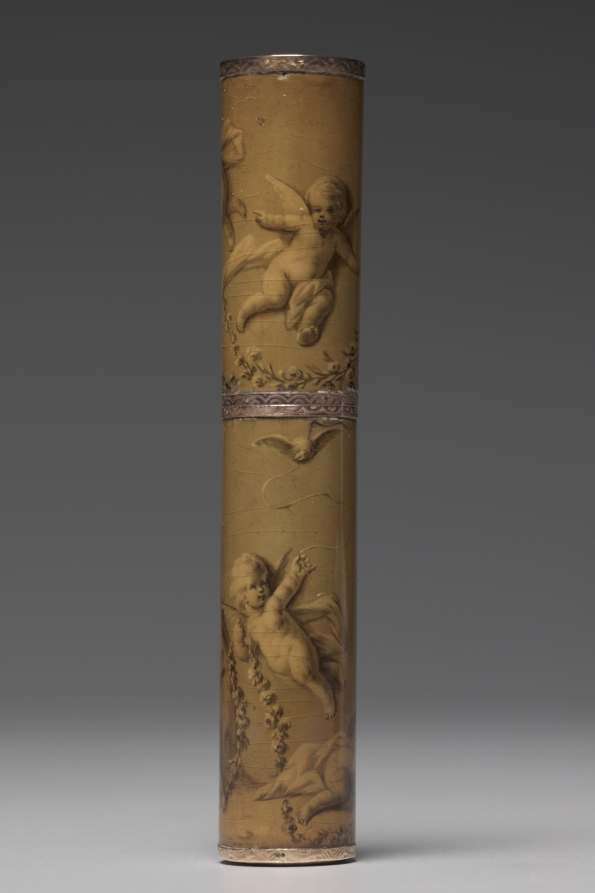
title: Needle Case (Etui à Aiguilles)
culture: France, Paris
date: 1768–69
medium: painted wood, gold mounts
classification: Miscellaneous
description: The material of cases like these delineated the status of the holder. More expensive materials such as ivory, tortoiseshell, or silver were reserved for wealthier users while more common cases were made of lacquered papier-mâché or wood. This wooden case is decorated with vernis martin, a domestic varnish imitating East Asian true lacquer. The sinuous lines, floral garlands, and putti, personifications of love in the form of winged infants, exemplify typical rococo imagery.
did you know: In the 1500s these cases were commonly fabricated to hold pins and needles for master tailors, but became more widely produced for women during the 1700s.